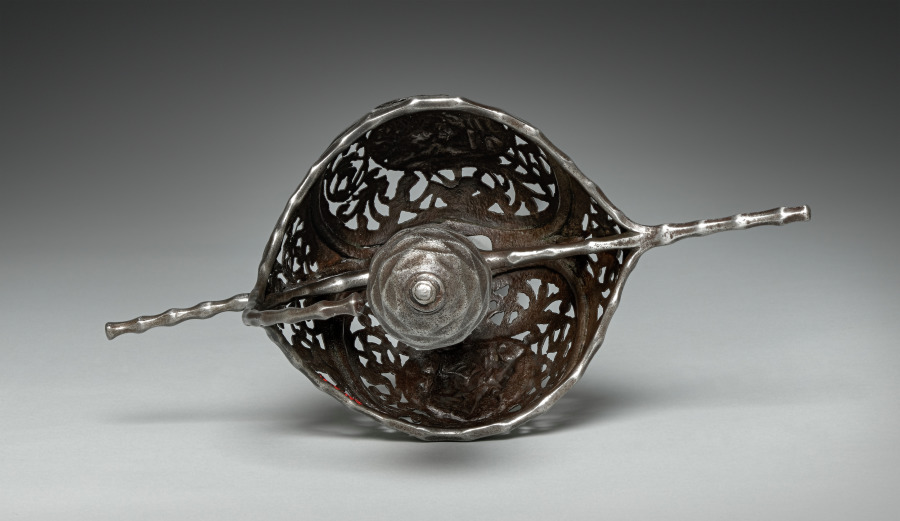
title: Cup-Hilted Rapier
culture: Italy, Milan?, 17th century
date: c.1610–30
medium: steel, pierced, chased and chiseled; wire ferrules on leather-covered wood grip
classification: Arms and Armor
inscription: inscribed on blade: FPNDRITH (on one face) RDFTPHNI (on the other)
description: The rapier was a sword worn with civilian dress and used in duels. The term rapier derives from a 16th-century French word rapière, which in turn derived from the Spanish espada ropera, or “dress sword.” The rapier was a light weapon with a straight double-edged and pointed blade that, with the development of the art of fencing in the 1500s and 1600s, gradually became narrower and lighter, and thus suitable for thrusts only. With the new technique of swordplay emphasizing the point of the blade, sword guards became more complex to protect the duelist’s unarmored hand. These elaborate guards were frequently decorated by various techniques—chiseling, bluing, russeting, and damascening.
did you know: Over time the blade of a rapier became longer, based on a belief that a longer blade made it easier to hit one's adversary and, at the same time stay beyond the reach of his weapon.